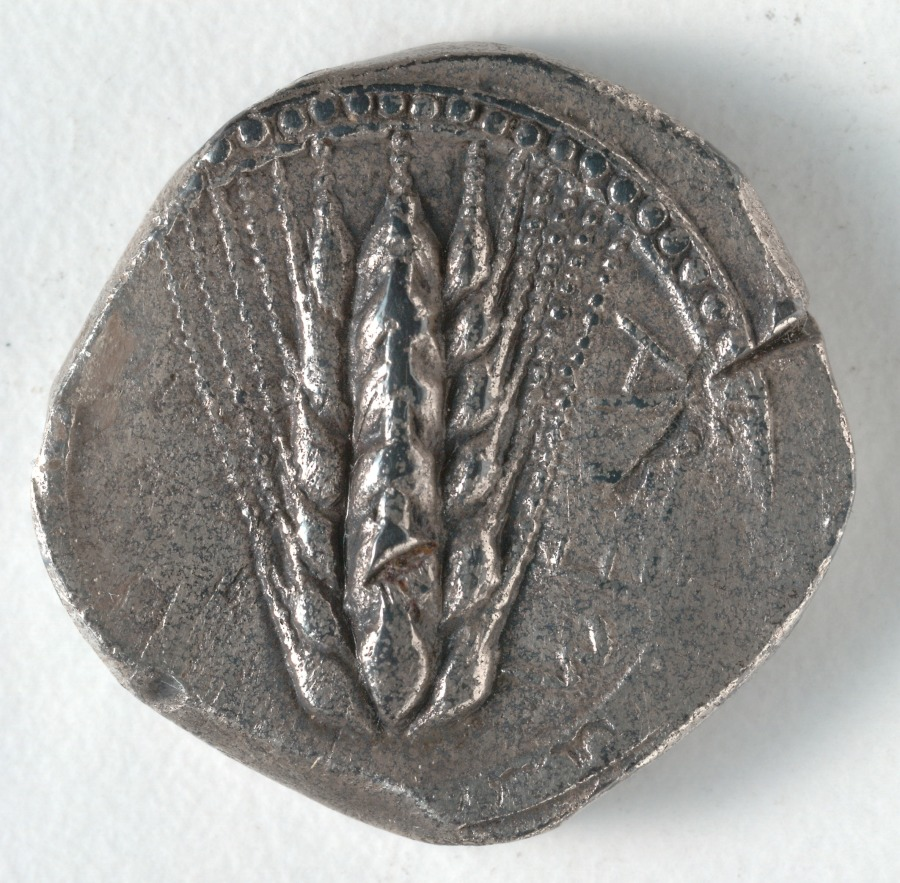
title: Stater: Barley (obverse); Barley, Incuse (reverse)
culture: Greek, minted at Metapontion (South Italy)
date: c. 530–510 BCE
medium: silver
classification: Coins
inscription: ΜΕΤΑ